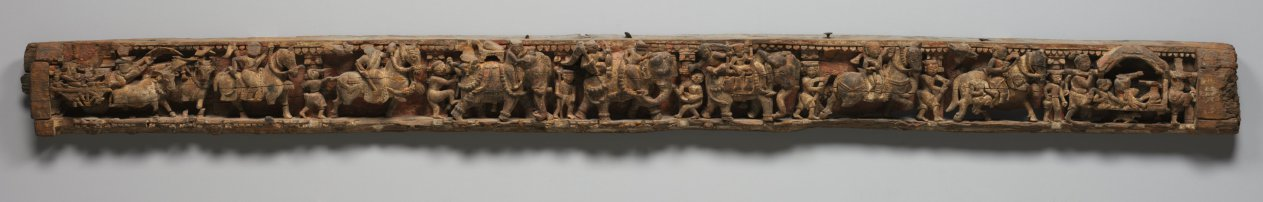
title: Narrative Frieze: Dignitaries in Palanquin and Bullock Cart - Architrave from a Jain Temple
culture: India, Gujarat, 16th-17th century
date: 1500s-1600s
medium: wood with traces of color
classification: Sculpture